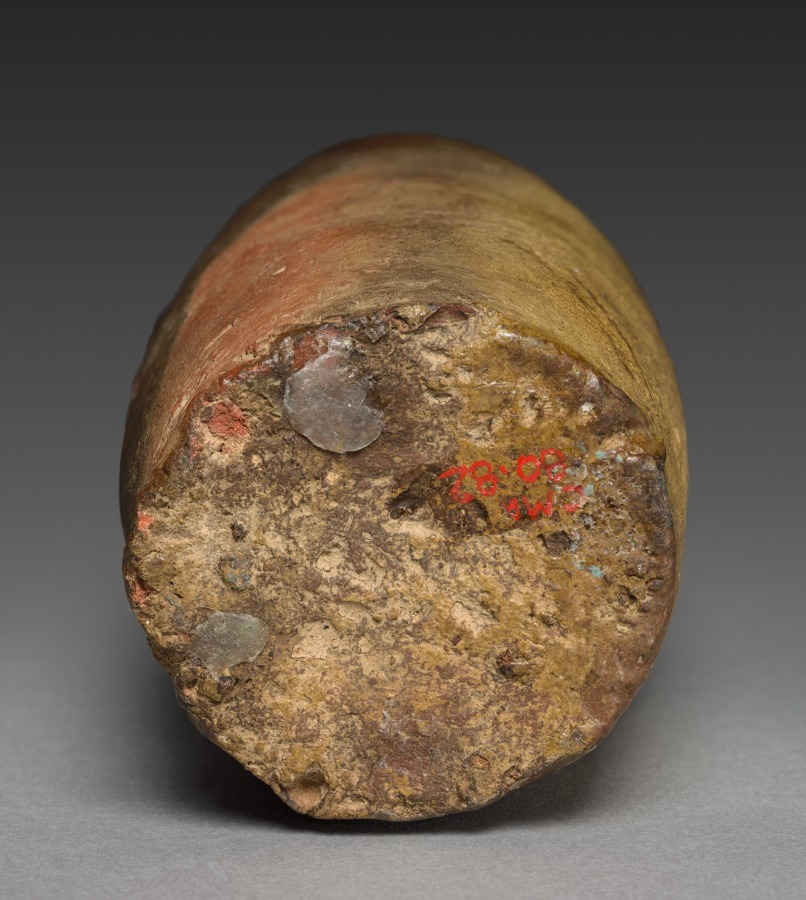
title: Sake Bottle: Ryukyu Namban Ware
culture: Japan, Edo period (1615–1868)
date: 1700s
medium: Ryukyu Namban Ware: stoneware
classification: Ceramic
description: Note the rich color gradations over the body that range from a deep brown to olive to ochre to a rust-red. The incised and gouged markings on the bottle contribute to its rustic texture.